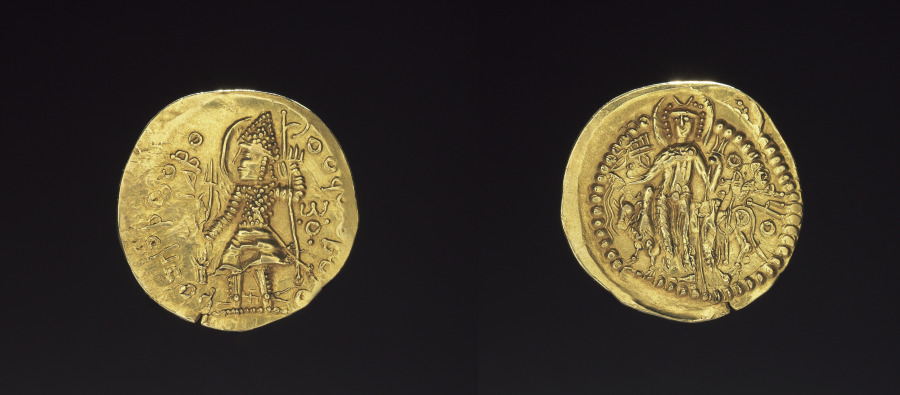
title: Coin of Kushan King Vasudeva II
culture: India, Kushan, Vasudeva II (c. 275–300 CE)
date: 200s CE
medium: gold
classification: Coins